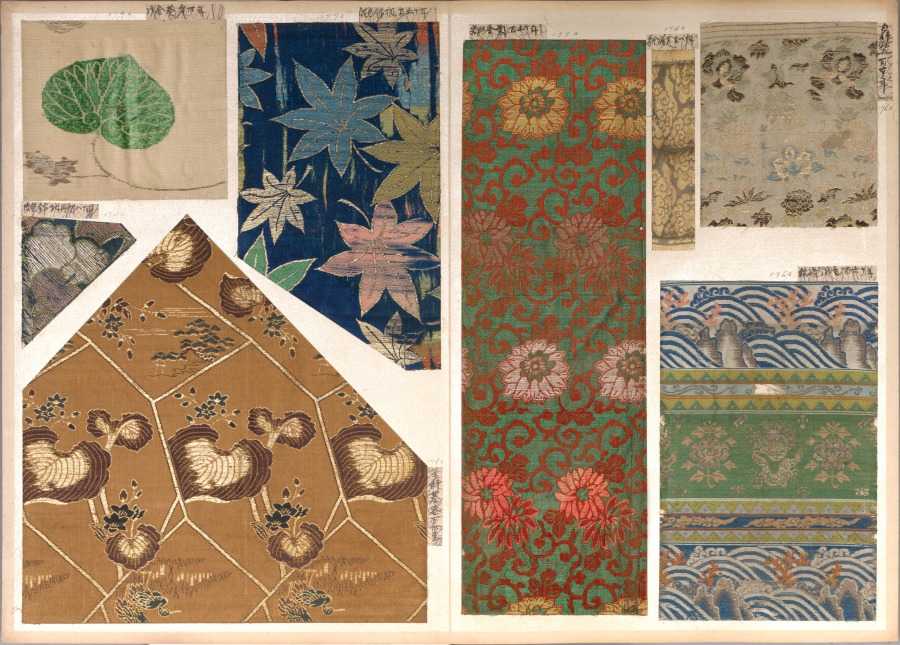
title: Album of Textile Samples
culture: Japan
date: 1790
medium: silk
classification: Textile